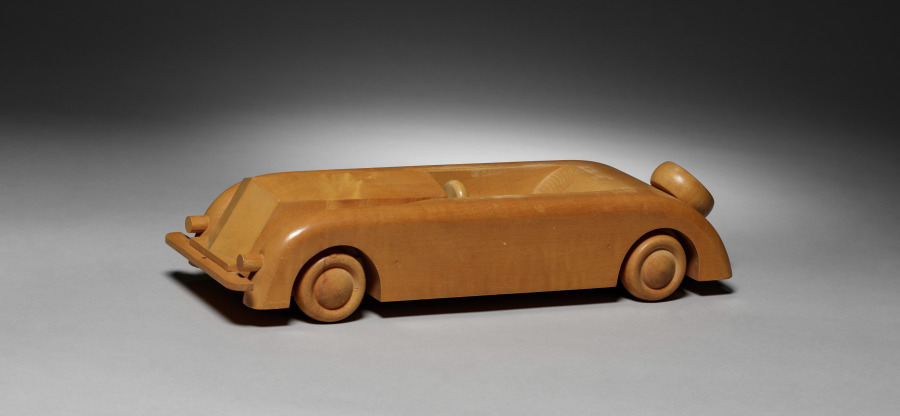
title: Streamline Automobile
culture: Denmark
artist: Boysen Toys (Danish)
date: 1900s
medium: wood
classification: Wood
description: Credit line: John D. Rockefeller General Education Board Grant II